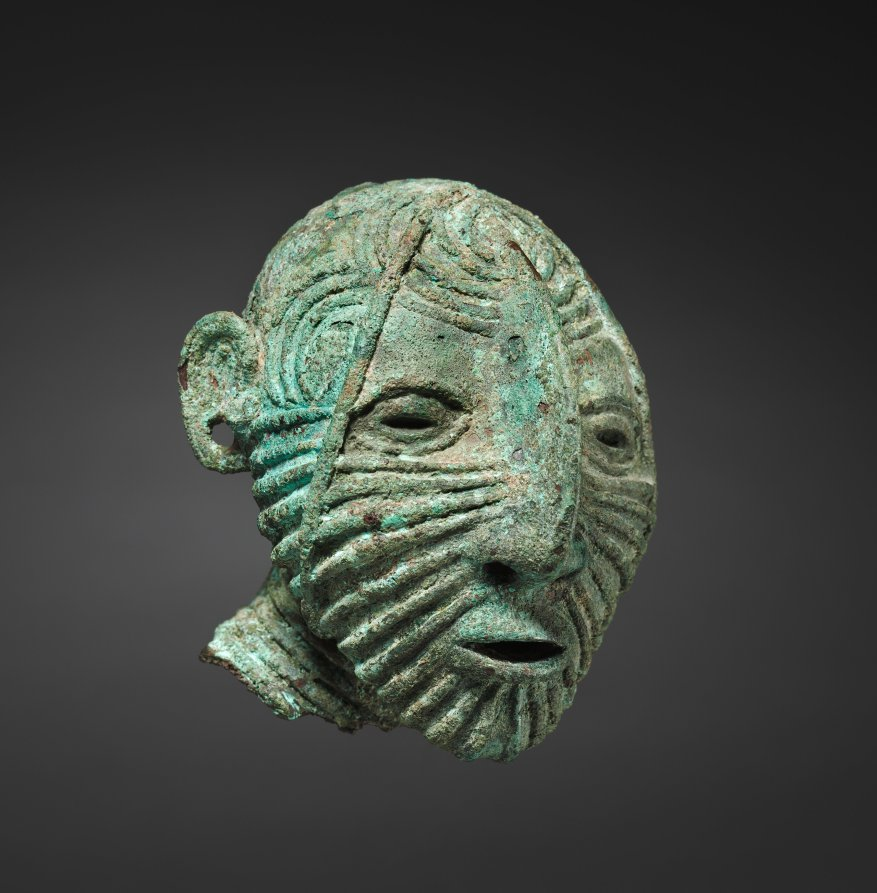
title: Male Head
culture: South East Asia, Thailand, Ban Chiang, Neolithic period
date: c. 1000 BCE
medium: bronze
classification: Sculpture